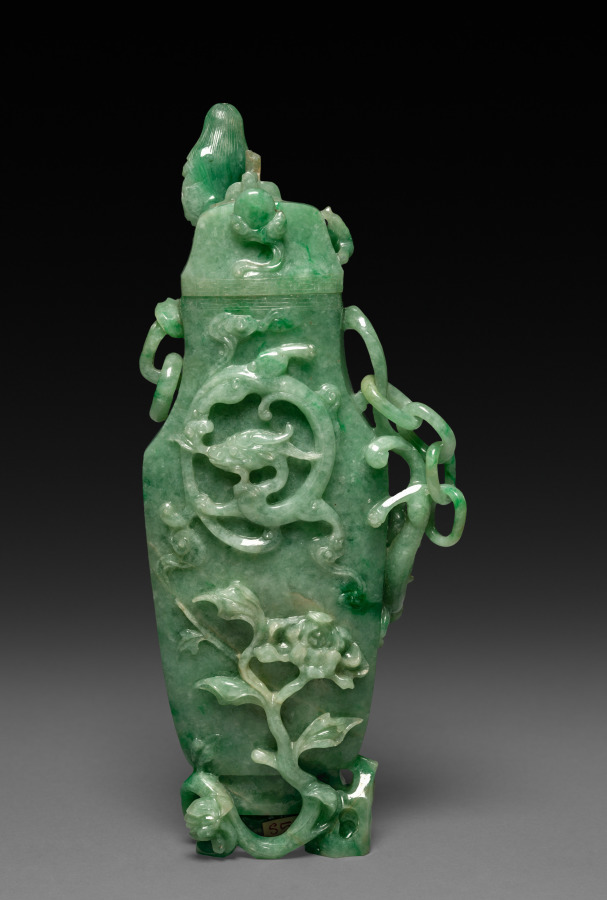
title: Three-Sectional Altar Group: Cylindrical Carving with Phoenix (lid)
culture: China, Qing dynasty (1644-1911)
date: 1644–1911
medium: jade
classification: Jade